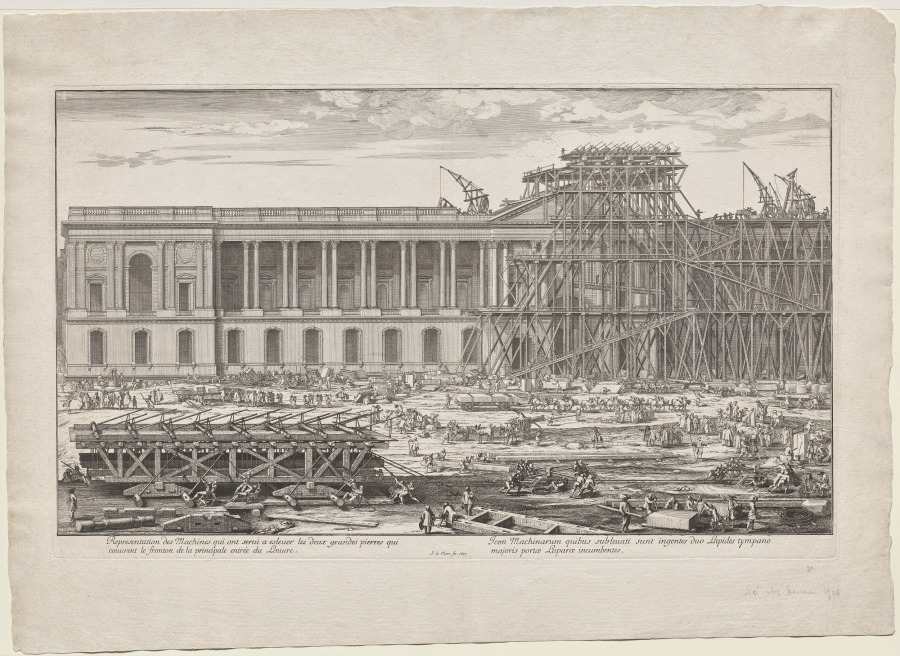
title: Representation des Machines qui ont servi à eslever les deux grandes pierres qui couvrent le fronton de la principale entrée du Louvre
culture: France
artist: Sébastien Le Clerc I (French, 1637–1714)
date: 1677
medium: etching and engraving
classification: Print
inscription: in graphite, recto, lower right: [illegible]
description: Sébastien Leclerc’s etching showing the construction of one facade of the Louvre Palace in Paris shows the machines used to drag and raise a sixty-foot-long stone to cover both sides of a pediment. Leclerc shows a machine in the left foreground that drags the large stone while in the background, at the top of the pediment and an elaborate scaffolding, cranes can be seen raising and placing stone. Leclerc was among a number of printmakers who worked for King Louis XIV, helping to document his many building campaigns and art collections.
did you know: King Louis XIV made improvements to the living quarters of the Louvre Palace as seen in this 1677 print, but soon abandoned Paris for his palace at Versailles, where he lived until his death in 1715.